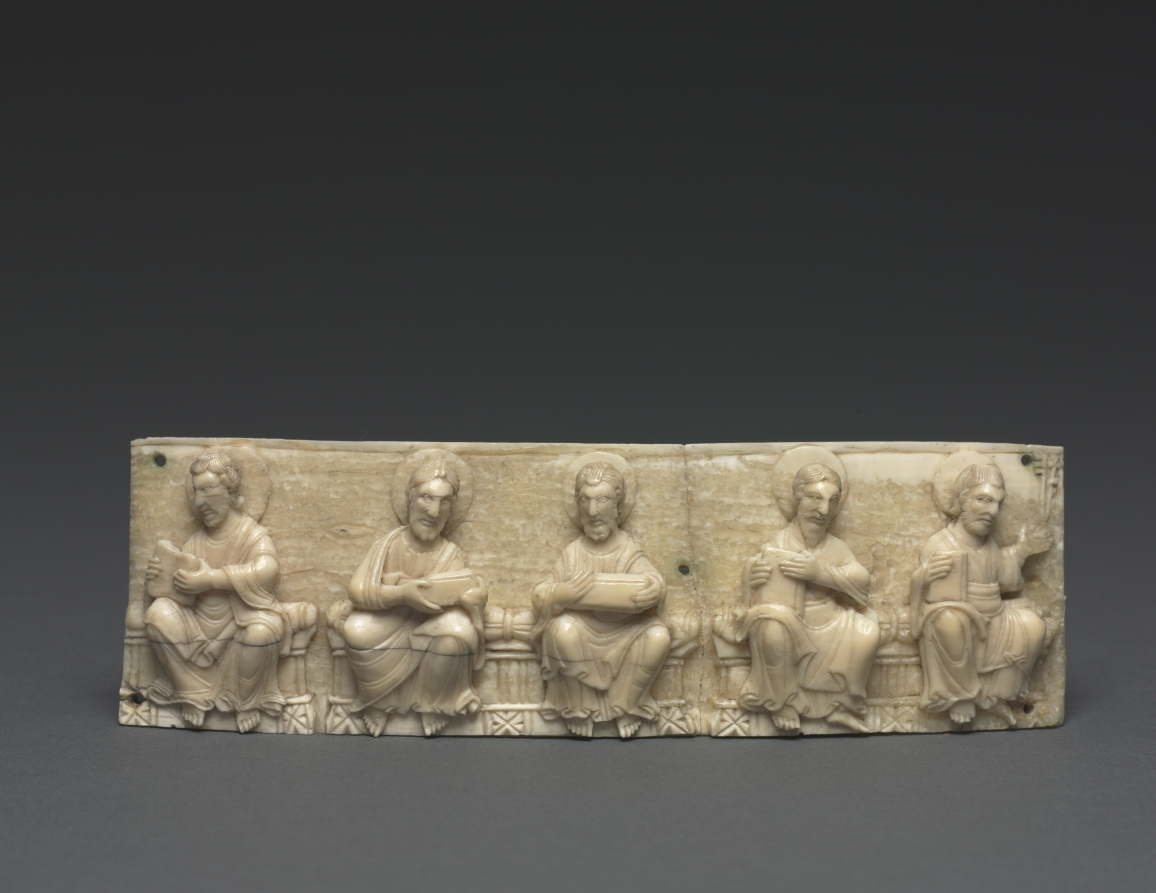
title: Plaque from a Portable Altar Showing Christ and the Apostles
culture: Germany, Lower Rhine Valley, Romanesque period, 11th century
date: 1050–1100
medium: walrus ivory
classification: Ivory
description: This intricately carved ivory panel once decorated the side of a portable altar. One of three plaques, it depicts Christ's apostles and was one of the first major acquisitions of William M. Milliken, the museum's first curator of decorative arts and later director (1930–1958). As Milliken later recalled, the pieces "were immensely intriguing, monumental in scale, even if tiny in size, the Christ in the mandorla could have been enlarged and would have graced the tympanum of a great cathedral."